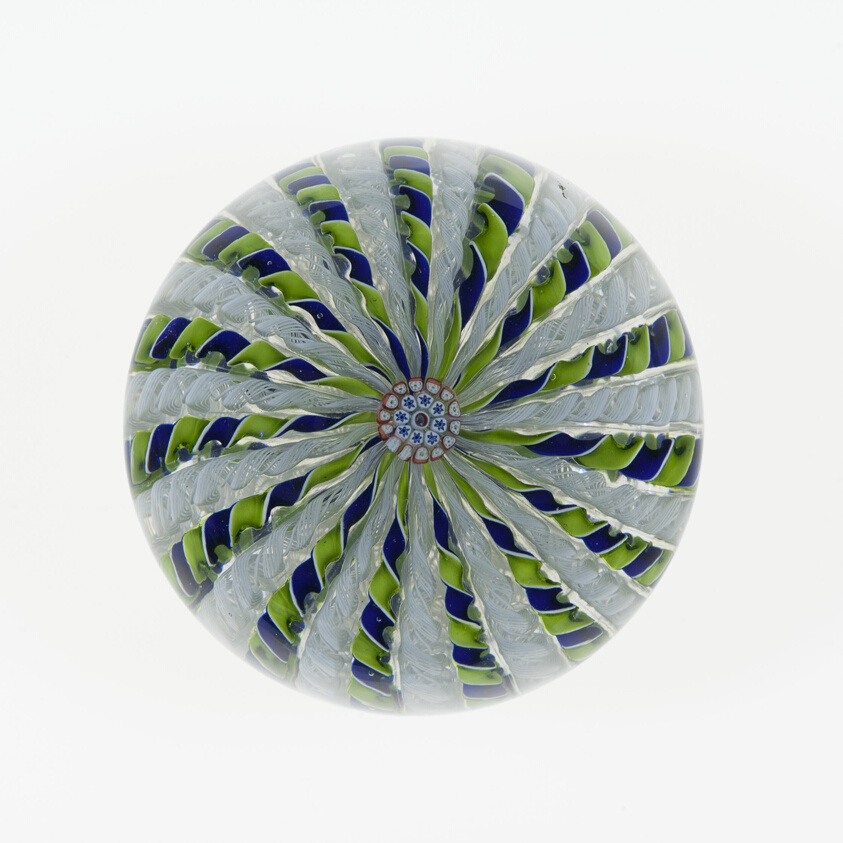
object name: Glass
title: Paperweight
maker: Saint-Louis Glassworks (Cristalleries de Saint-Louis); Lorraine, France, founded 1586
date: c. 1845/60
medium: Glass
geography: Saint-Louis-lès-Bitche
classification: paperweight; glass